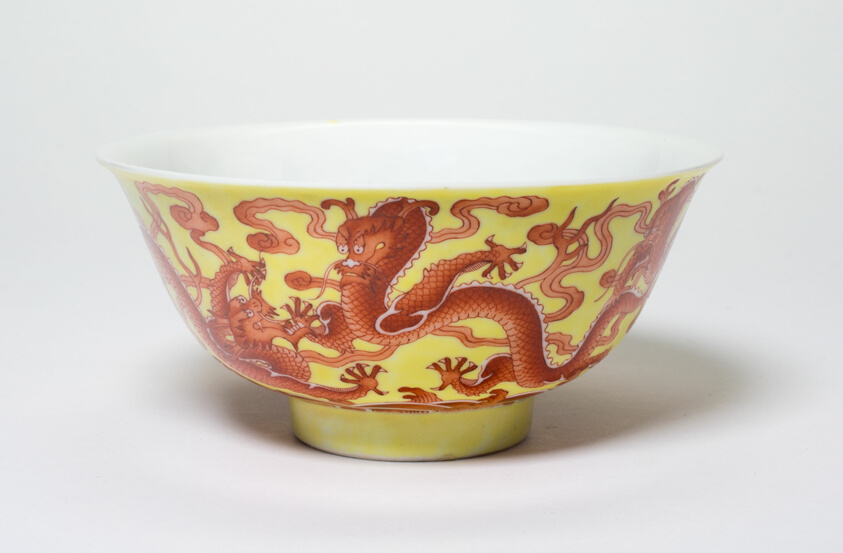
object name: Vessel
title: One of a Pair of Yellow and Iron-Red 'Dragon' Bowls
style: Chinese (culture or style)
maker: China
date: Qing dynasty (1644–1912), Qianlong period (1736–1795)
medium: Porcelain painted in underglaze iron red and overglaze yellow enamel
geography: China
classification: bowl; porcelain; dish (vessel); ceramics; asian art; vessel